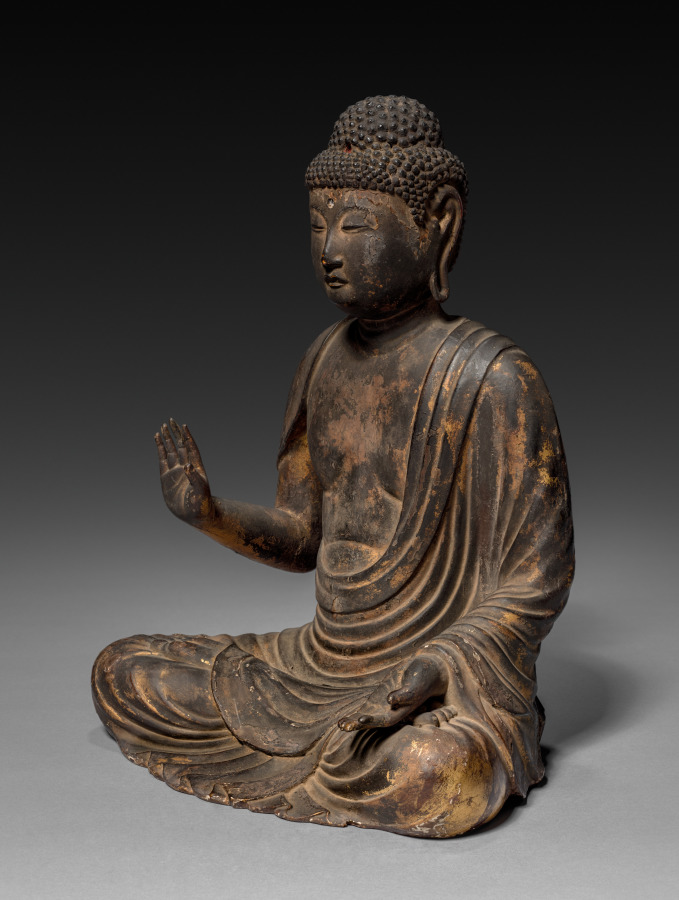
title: Shakyamuni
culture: Japan, Meiji period (1868–1912)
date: c. 1868–1912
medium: Wood with traces of lacquer and gilding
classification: Sculpture